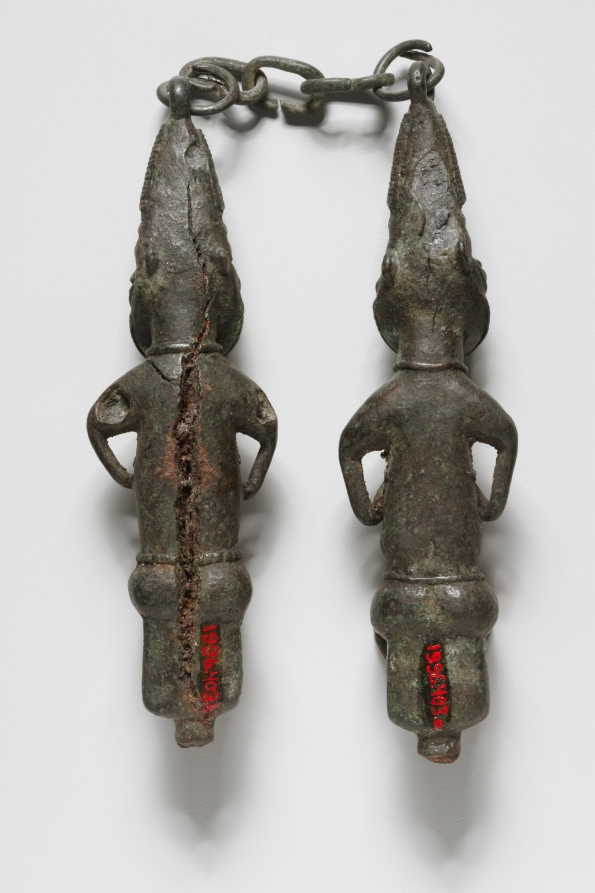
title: Pair of Ritual Staffs (ẹdan Ògbóni)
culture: Africa, West Africa, Nigeria, Yorùbá-style maker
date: possibly 1800s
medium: Copper alloy and iron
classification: Sculpture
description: The chain connecting these two figures allows them to be worn in public by a member of the Ògbóni or Òṣùgbó association as authority emblems. The male on the right gives the association’s typical salute by clasping his left fist on the right one, while the female on the left holds her breasts as a sign of welcome and generosity. The use of copper alloy and iron expresses Ògbóni/Òṣùgbó's concerns with longevity and durability.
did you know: Imagine how this would look when its owner wore it; the chain would go around the back of the neck and the figures would rest on their chest.